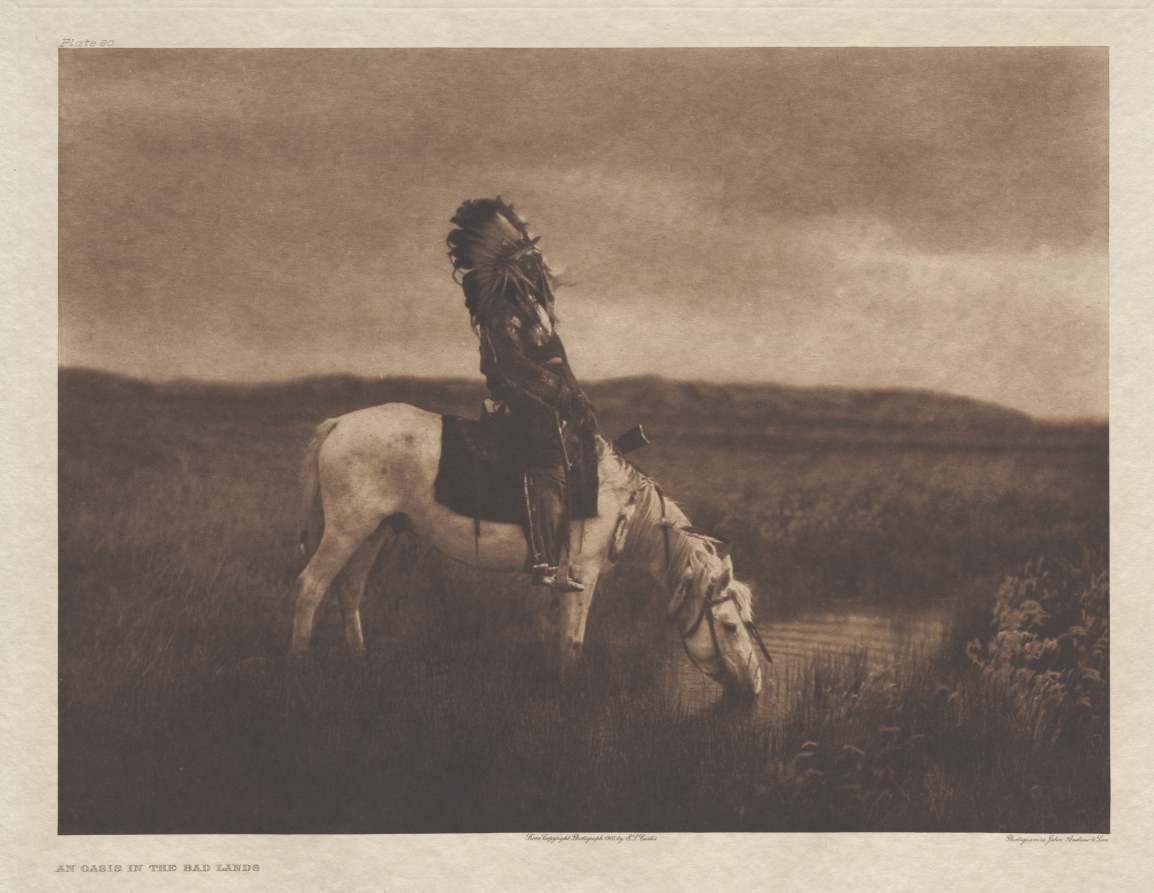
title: Portfolio III, Plate 80: An Oasis on the Bad Lands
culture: America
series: The North American Indian: being a series of Portfolios picturing and describing the Indians of the United States, the Dominion of Canada, and Alaska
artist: Edward S. Curtis (American, 1868–1952)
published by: The University Press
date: 1905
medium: photogravure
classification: Portfolio